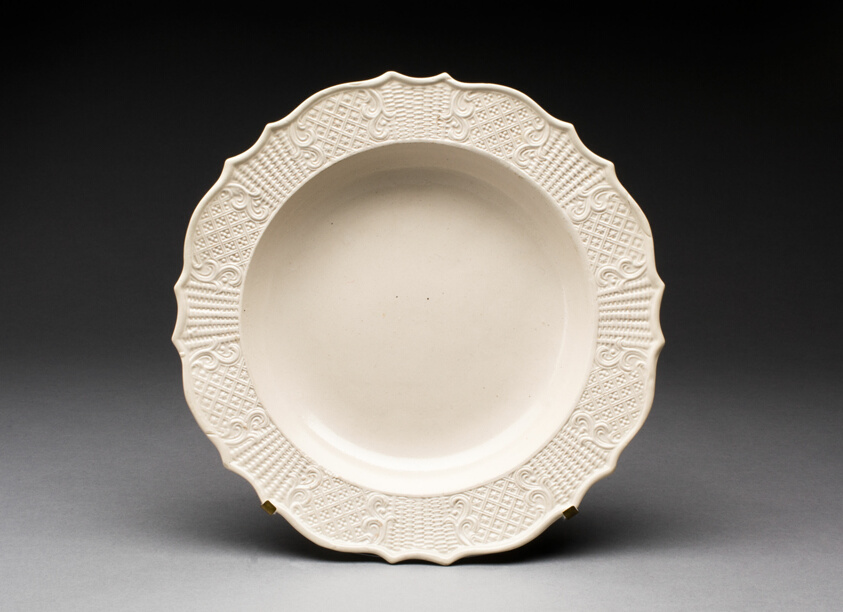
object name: Ceramics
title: Soup Plate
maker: England, Staffordshire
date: 1750/59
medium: Salt-glazed stoneware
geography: Staffordshire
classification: plate (general, dish); dish (vessel); stoneware; salt-glazed stoneware; ceramics; european decorative arts